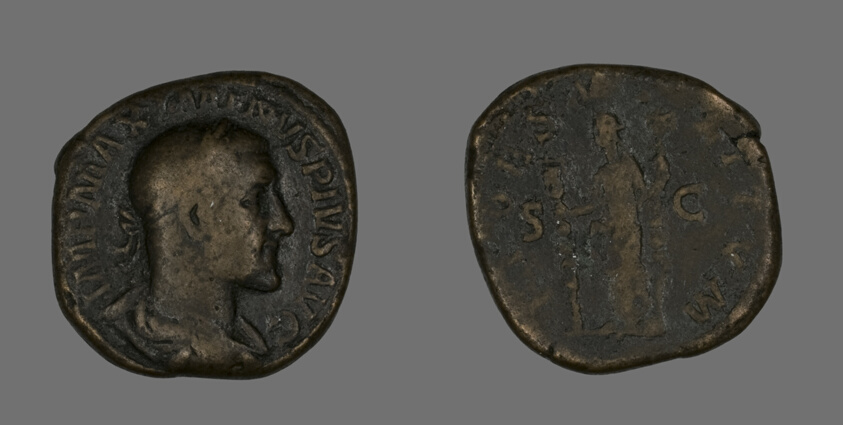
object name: Coin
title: Sestertius (Coin) Portraying Emperor Maximinus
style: roman (ancient, style or period)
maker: Roman, minted in Rome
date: 235-236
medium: Bronze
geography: Roman Empire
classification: coin; ancient art